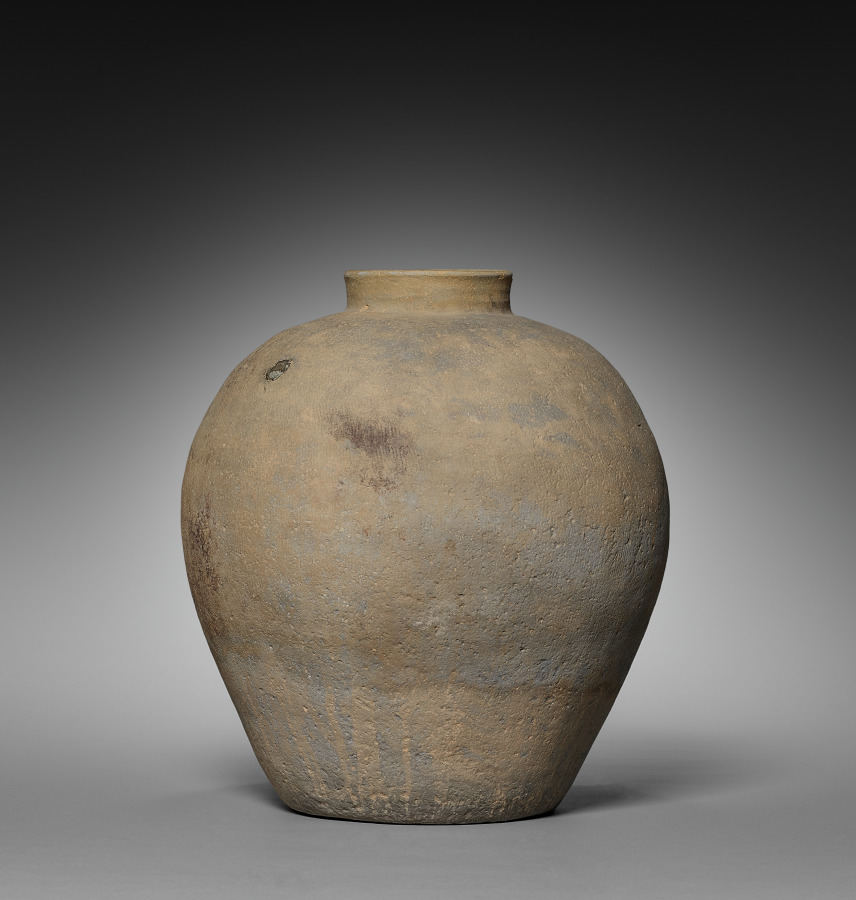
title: Burial Urn with Cover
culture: Korea, Three Kingdoms period (57 BCE–668 CE)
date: 300s–500s CE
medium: earthenware with impressed design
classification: Ceramic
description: Produced in closed kilns built on hillsides during the Three Kingdoms period, this lidded jar once contained the cremated remains of the dead. This type of burial jar became widespread after the introduction of Buddhism, as cremation became a common practice in Korea.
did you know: Closed kilns built on hillsides became widely used for producing this type of pottery vessel in Korea during the Three Kingdoms period.